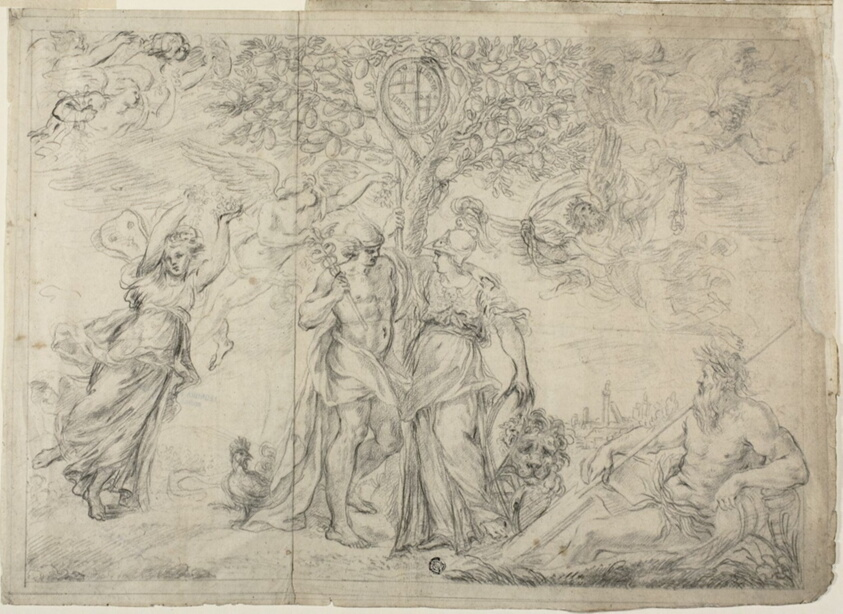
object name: Drawing and Watercolor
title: An Allegory of Bologna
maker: Alessandro Algardi (Italian, 1598-1654)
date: 1630/39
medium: Black chalk on ivory laid paper, partially laid down on ivory laid paper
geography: Italy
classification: graphite; drawings (visual works); prints and drawing